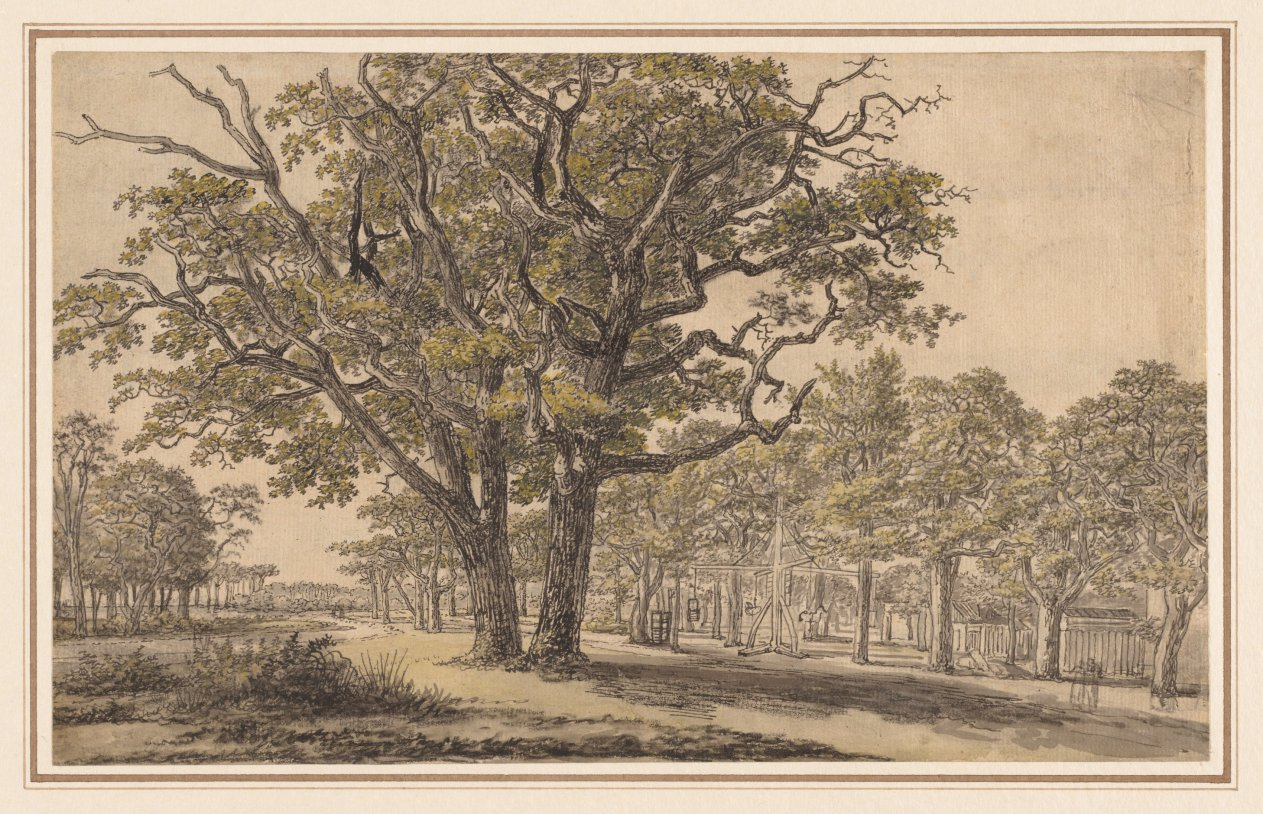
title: Landscape (recto)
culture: France, 19th century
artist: Georges Michel (French, 1763–1843)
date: 1800–1843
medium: pen and black ink, brush and gray and yellow wash, yellow gouache, and black chalk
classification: Drawing